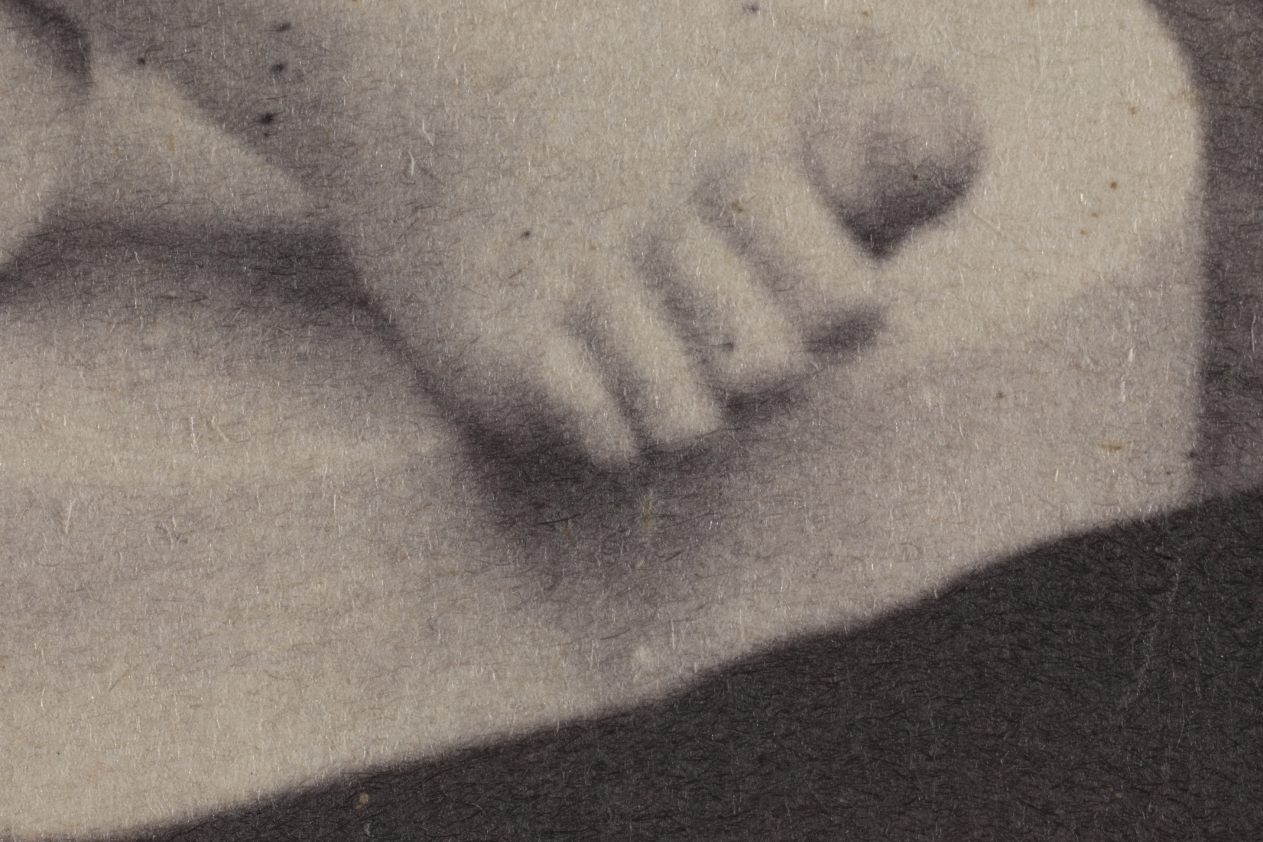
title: Statue of a Youth in Large Hat (from a John R. Johnston album)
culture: America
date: before 1857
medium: salted paper print from wet collodion negative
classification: Photograph